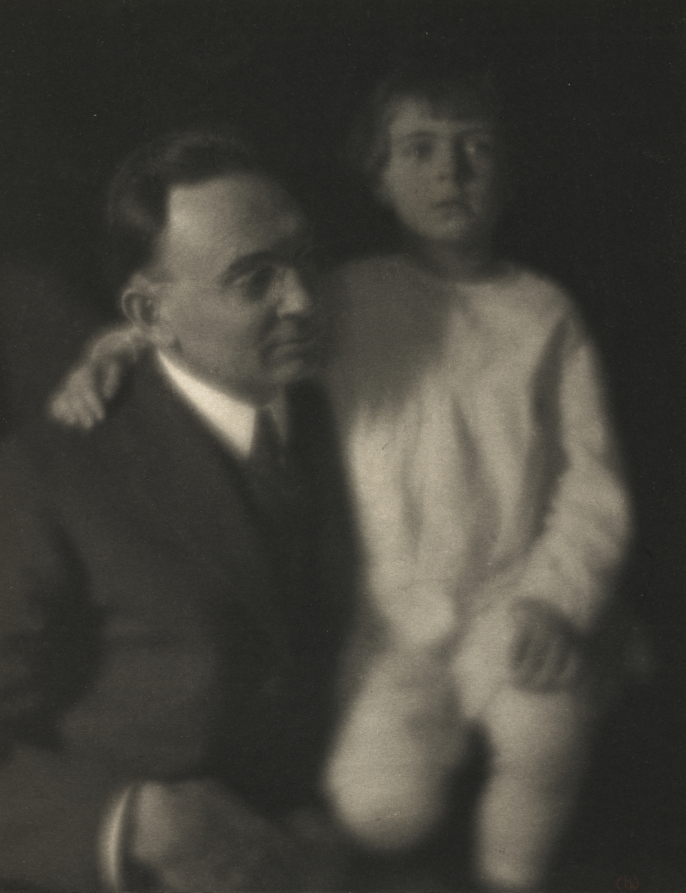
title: Walter L. Flory and John Flory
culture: America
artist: Clarence H. White (American, 1871–1925)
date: 1915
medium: platinum print with graphite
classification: Photograph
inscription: Written in red ink on recto of photo: "CHW"; in pencil on recto of original mount: "Clarence H. White [signed] '15"